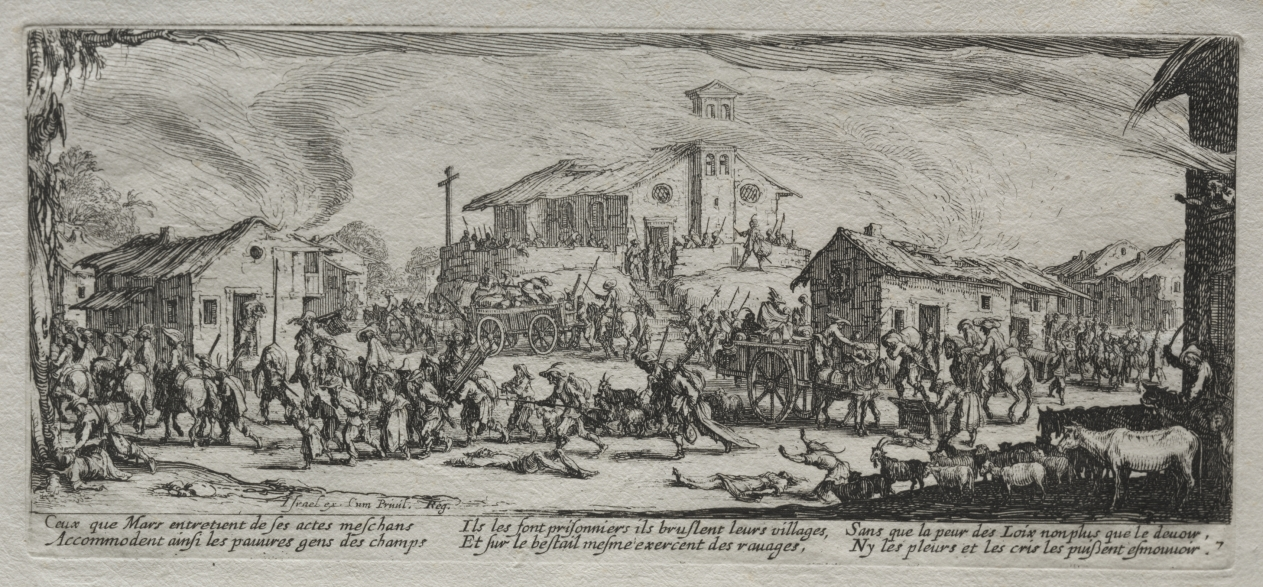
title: The Large Miseries of War: Pillaging and Burning of a Village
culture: France, 17th century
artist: Jacques Callot (French, 1592–1635)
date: 1633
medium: etching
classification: Print